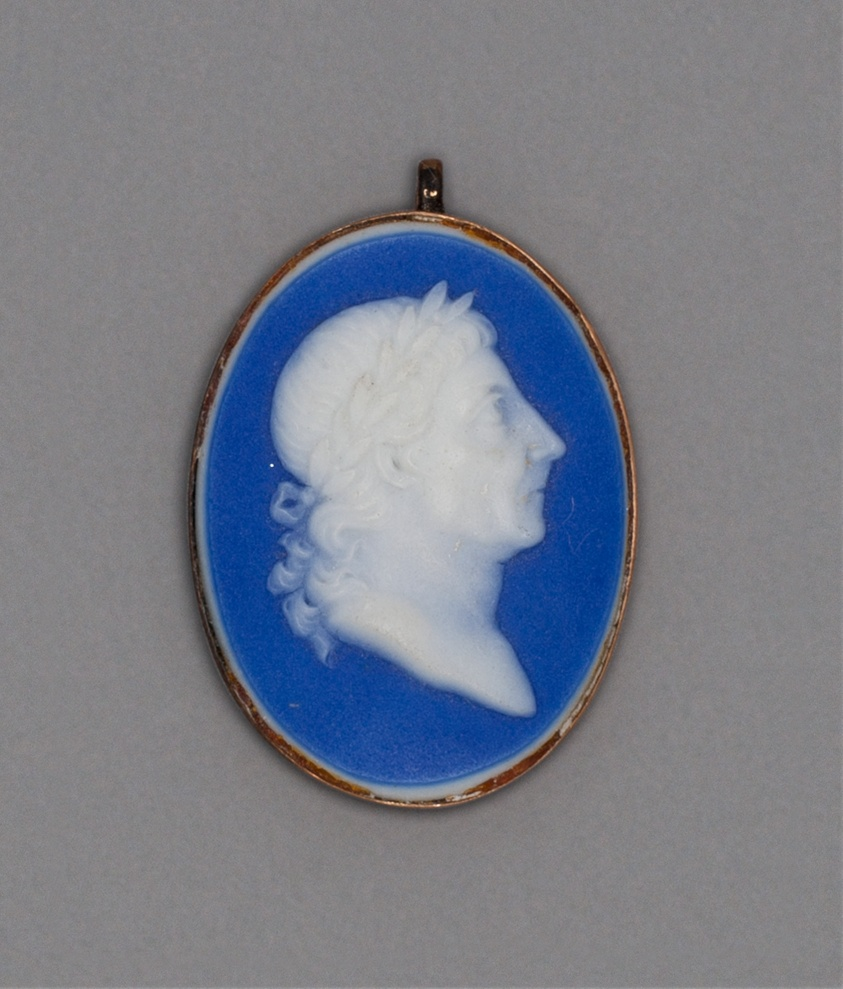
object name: Ceramics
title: Cameo with Head of a Man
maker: Wedgwood Manufactory (England, founded 1759)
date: Late 18th century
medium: Stoneware (jasperware)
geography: Burslem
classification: cameo (sculpture); sculpture; stoneware; european decorative arts; ceramics